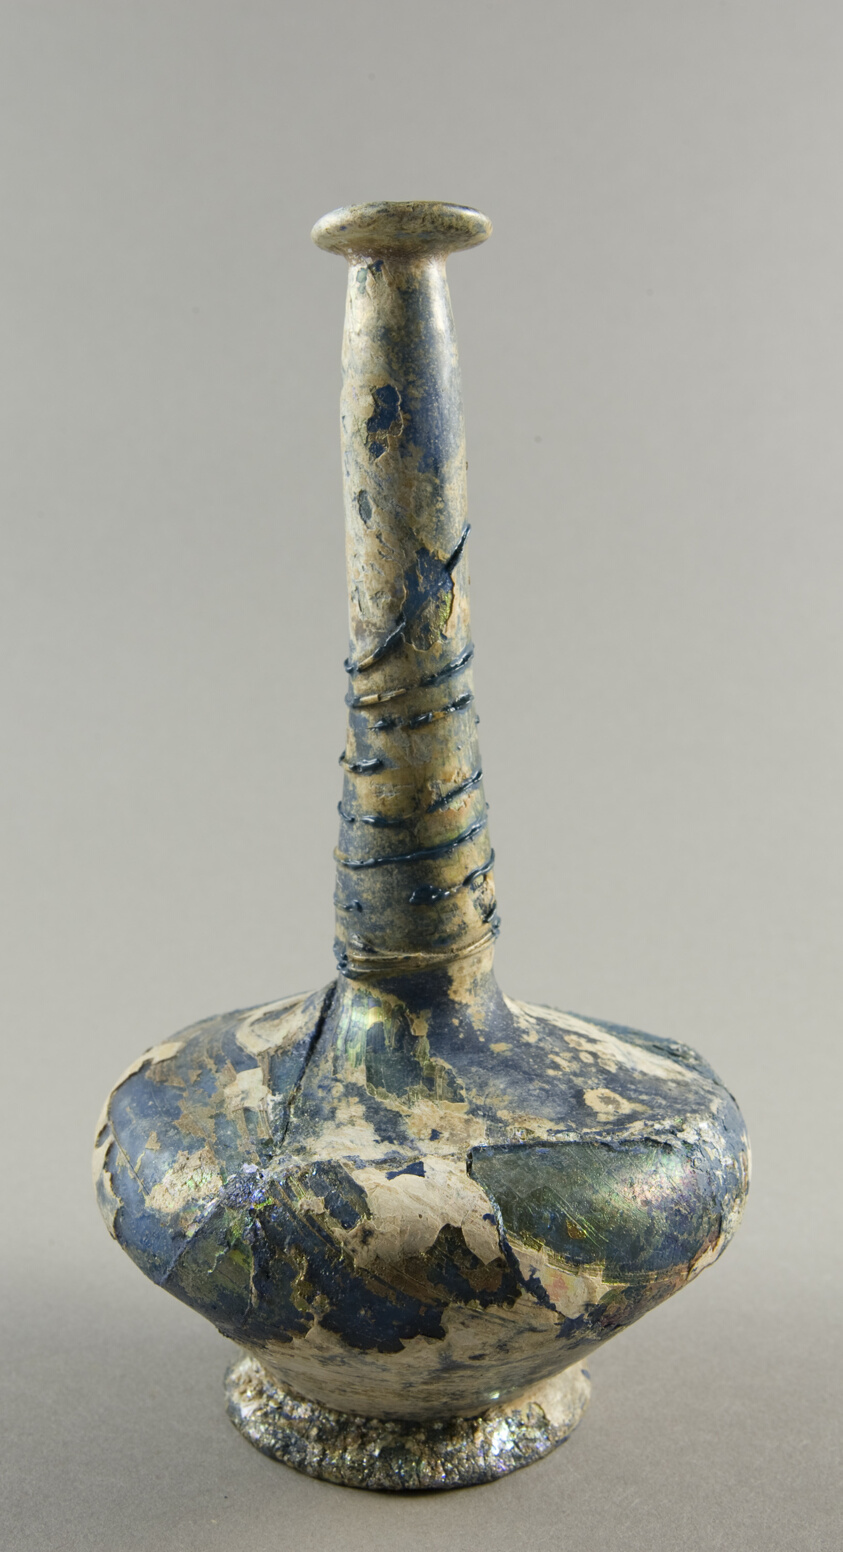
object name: Vessel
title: Bottle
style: ancient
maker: Ancient Mediterranean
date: 12th-13th century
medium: Glass, blown technique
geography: Mediterranean Region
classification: glass; vessel; ancient art